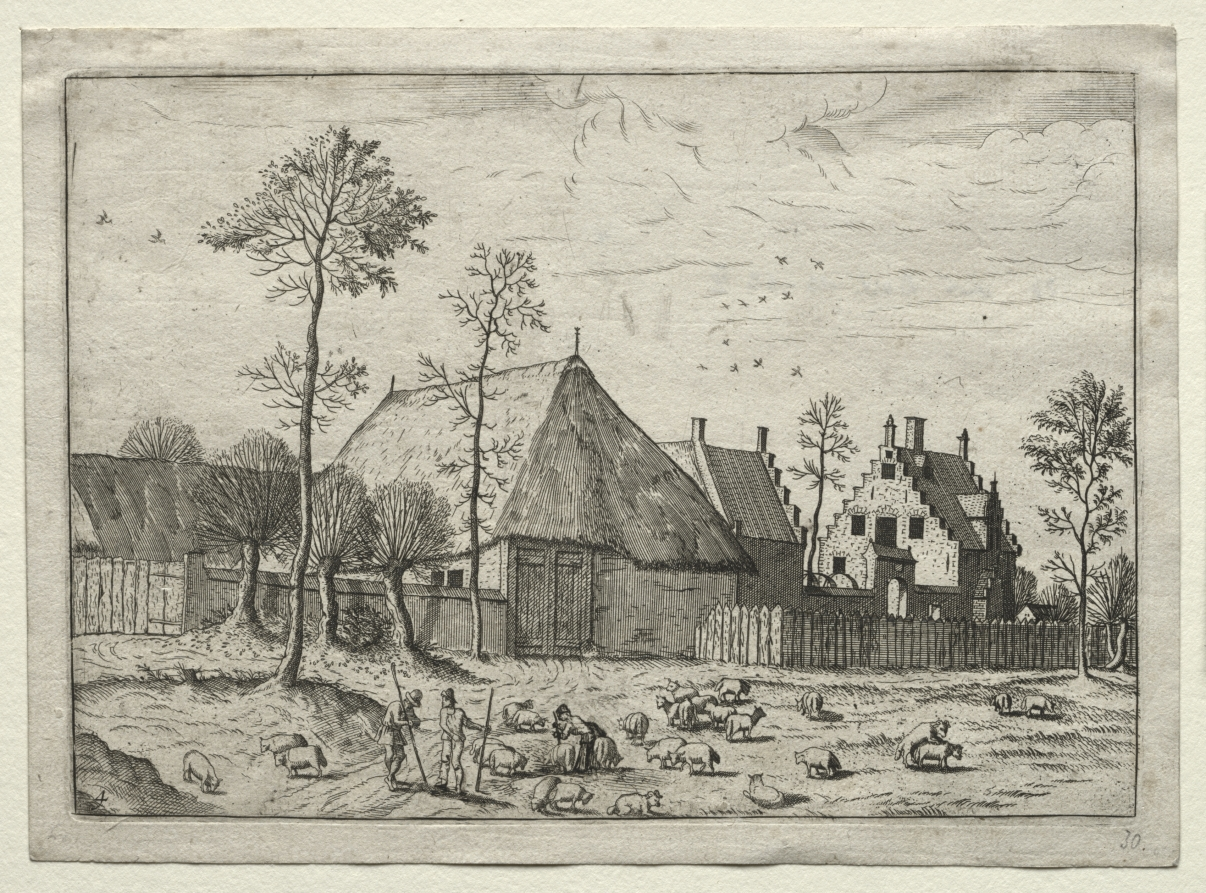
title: View of Villages in Brabant and Campine: Shepherds with Flock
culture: Flanders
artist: after Master of the Small Landscapes (Flemish)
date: c. 1559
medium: etching and engraving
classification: Print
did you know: This is among the first printed landscape prints made from a low viewpoint, as if replicating the experience of walking along a rural path.